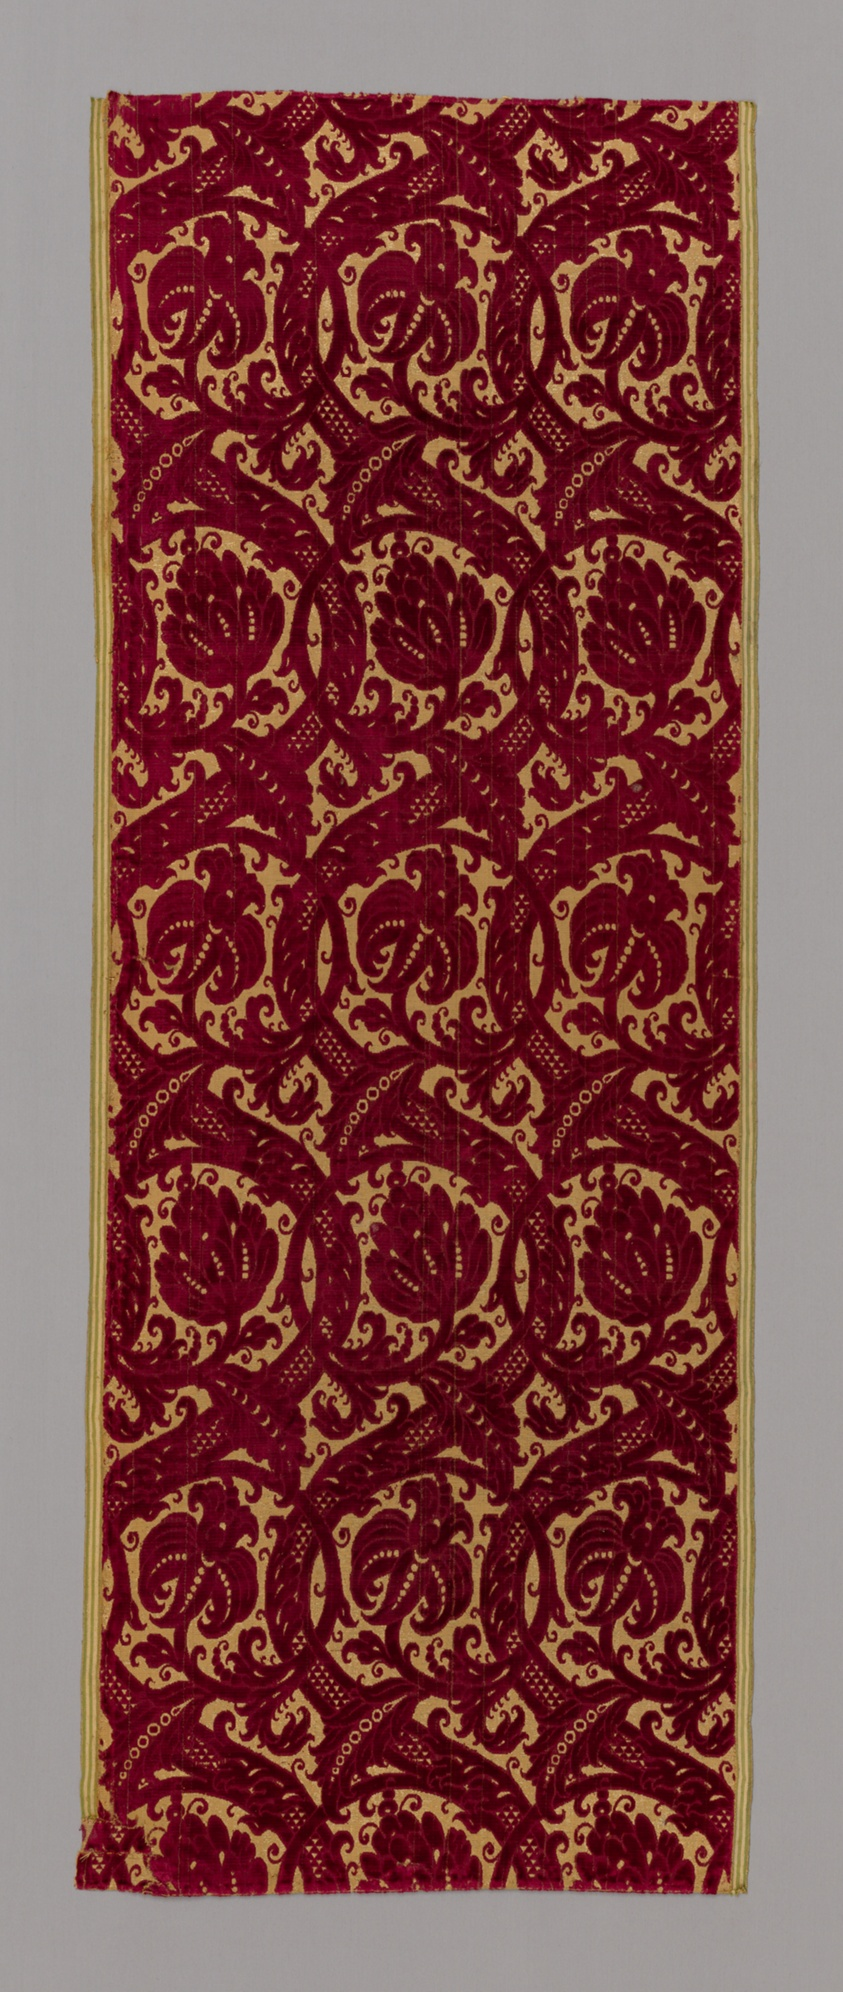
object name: Textile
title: Panel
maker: Italy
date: 1675/1700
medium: Silk and gold gilt strip, warp-float faced twill weave with supplementary patterning wefts tied by supplementary binding warps and supplementary pile warps forming cut, uncut, and voided velvet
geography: Italy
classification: textile; weaving; weaving - velvet